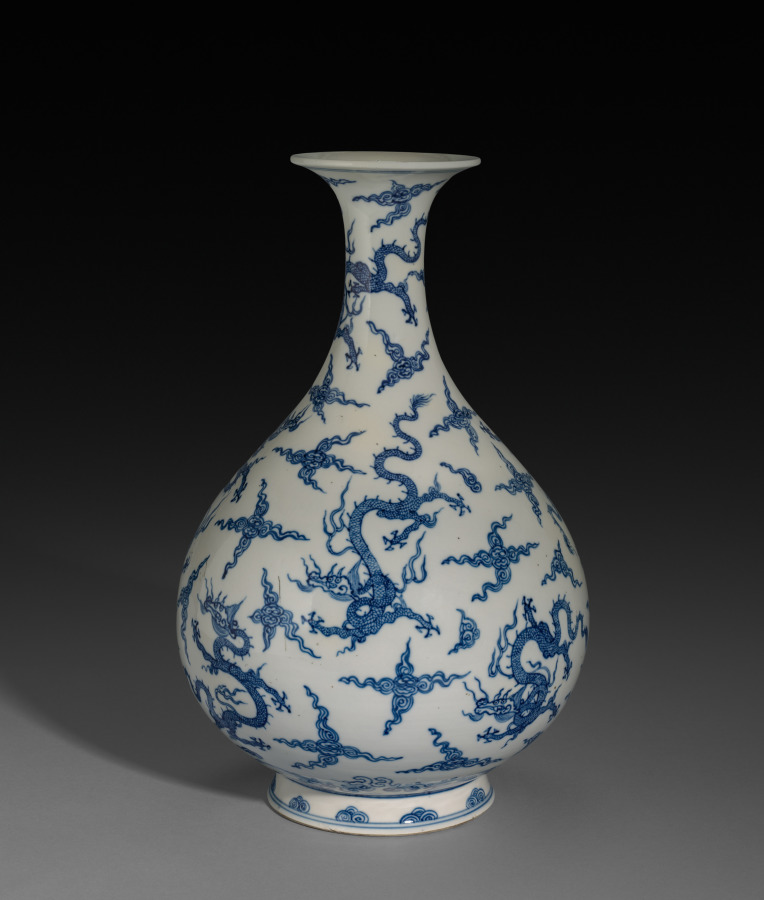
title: Bottle Vase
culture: China, Jiangxi province, Jingdezhen kilns, Qing dynasty (1644-1911), Yongzheng reign (1723-35)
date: 1723–35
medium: porcelain with underglaze blue decoration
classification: Ceramic